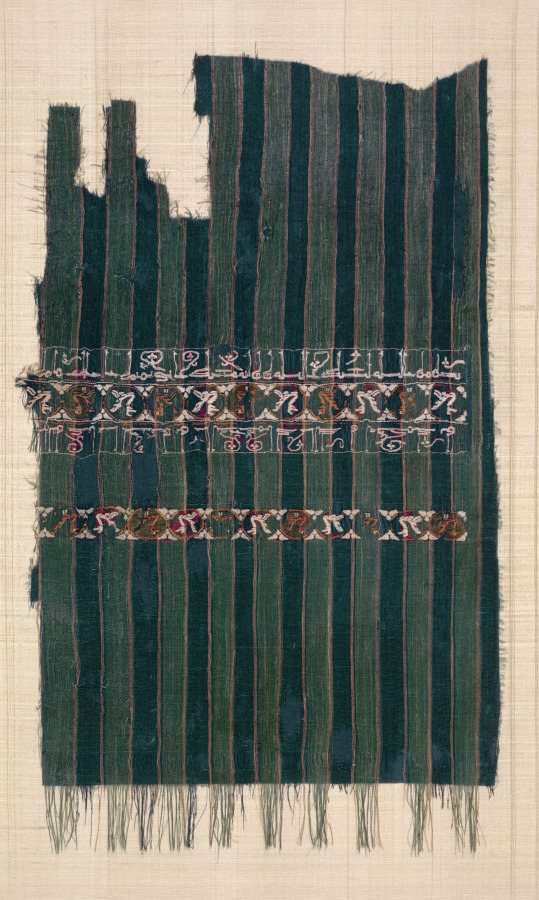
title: Striped tiraz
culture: Egypt, Fatimid period, reign of al-Mustansir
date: 1049–50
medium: plain weave with inwoven tapestry weave: linen and silk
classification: Textile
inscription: The lower line reads, "Help from Allah to the servant and friend of Allah, Ma’add Abu Tamin the Imam a[l-Mustansir bi-Allah]. . . ." The upper line reads, ". . . al-barakat al-Husayn bin al-Shaykh(?) ‘Imam al-Dawlah Muhammad bin [Ahmad]. . . ."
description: This rare striped, lightweight linen cloth was probably worn wrapped as a turban with the decorated end shown off in the front. The small birds in roundels appear to be mythological harpies with human faces. The Arabic text written with letters ending in fancy trefoils contains historical data, known as tiraz. The complete text generally includes Muslim blessings, the name of the ruler, and the place and date of manufacture. The lower line reads, "Help from Allah to the servant and friend of Allah, Ma’add Abu Tamin the Imam a[l-Mustansir bi-Allah]. . . ." The upper line reads, ". . . al-barakat al-Husayn bin al-Shaykh(?) ‘Imam al-Dawlah Muhammad bin [Ahmad]. . . ."